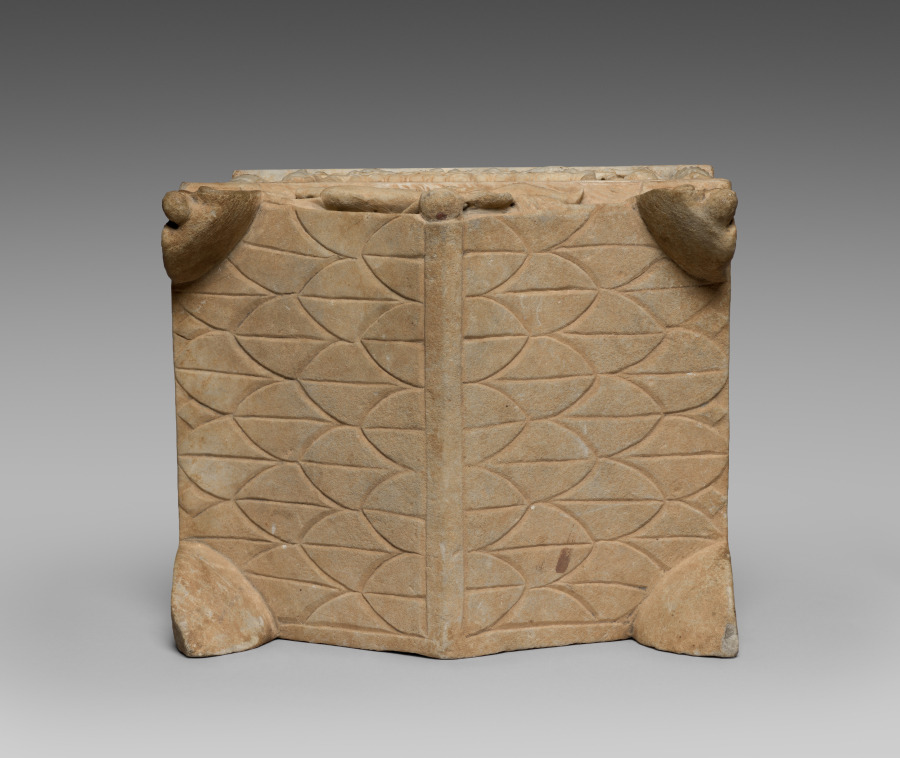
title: Cinerary Box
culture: Italy, Roman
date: 1–100 CE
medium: marble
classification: Sculpture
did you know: The central rectangular plaque would have been inscribed with an epitaph, either painted or carved.